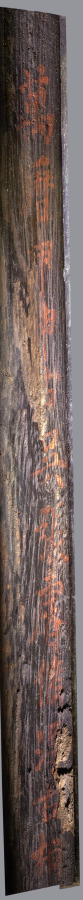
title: Guqin made by Zhang Ruixiu of Suzhou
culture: China, Ming dynasty (1368–1644)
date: 1584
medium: Seven-string Asian long zither, chordophone, made from wood, lacquer, mother of pearl, and silk strings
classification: Musical Instrument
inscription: 為海虞天池先生重斲/ 萬曆甲申古吳張睿脩得古桐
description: China’s most prestigious instrument, the guqin can be traced to the Chu culture almost 2500 years ago. By the late Ming dynasty, Jiangnan was a center of high-end guqin production. Coated in black lacquer, this elegantly crafted instrument is inscribed on the inside, stating it was made by Zhang Ruixiu of Suzhou for Mr. Tianchi of Haiyu, also known as Yan Cheng (1547–1625). Yan was a key figure in guqin music history and founder of the Yushan school in Suzhou. Zhang Ruixiu was a guqin maker, known for achieving a supreme tone quality. Ten instruments attributed to him are known, of which this guqin has the earliest date.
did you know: The 13 studs in mother-of-pearl inlay indicate finger positions for sounding harmonics.